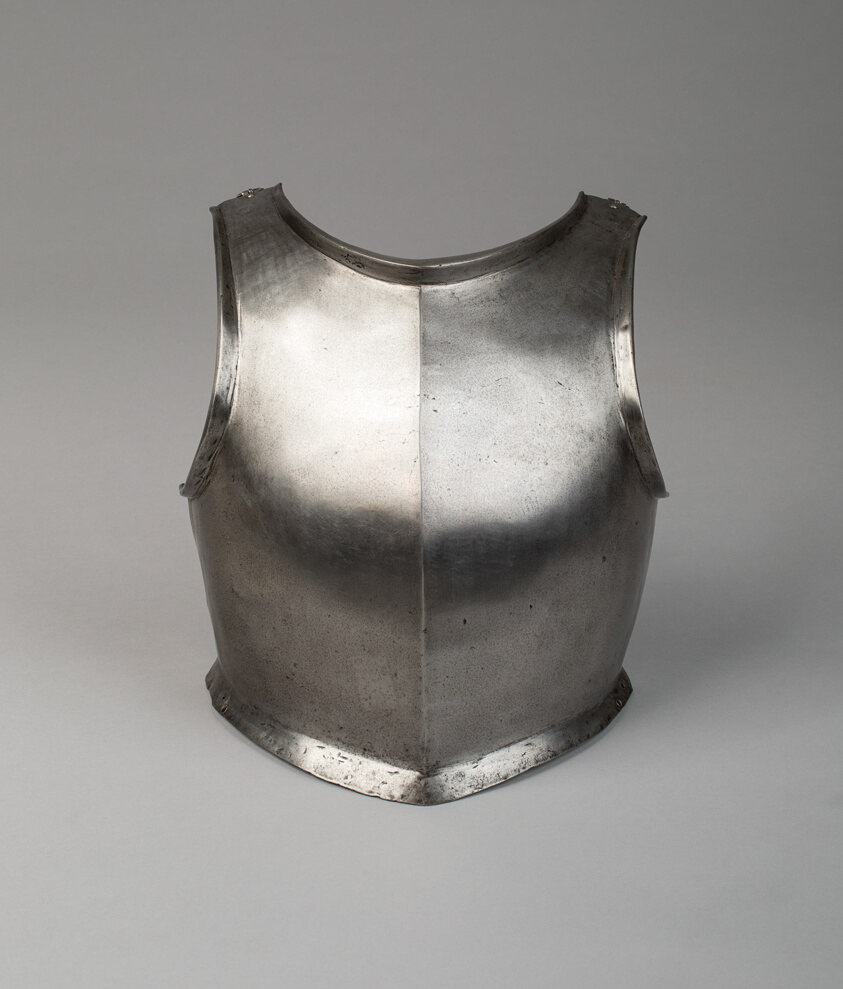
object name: Armor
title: Breastplate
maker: Spanish or northern Italian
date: 1500/20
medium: Steel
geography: Spain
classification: suit-element; armor; arms and armor